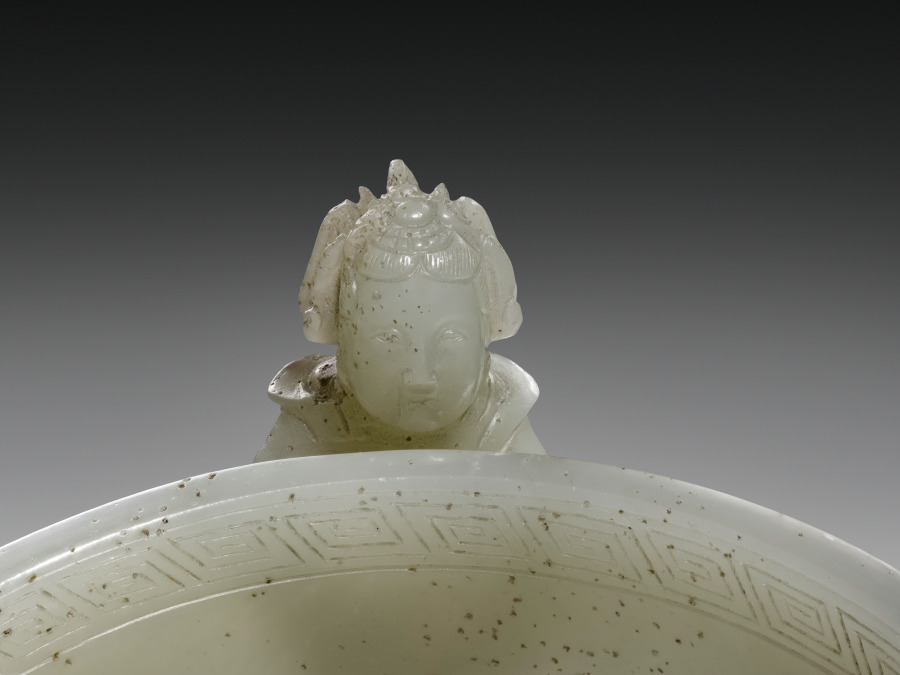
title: Cup with Daoist Figures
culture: China, Qing dynasty (1644–1911), Qianlong period (1736–95)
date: 1736–95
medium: Pale greenish-white jade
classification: Jade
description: During the Qing dynasty, Suzhou’s best products were sent north to the capital. Those that met imperial approval were sometimes graced with Qianlong’s mark, added by calligraphers and jade workers at court. The lack of a Qianlong mark on the Cleveland cup suggests that it might not have reached the court. Previously dated to the Yuan dynasty (1271–1368), new scholarship dates this cup to the Qing period.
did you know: Two female immortals serve as handles, while a Daoist procession with immortals, musicians, and attendants winds around the body of the cup.